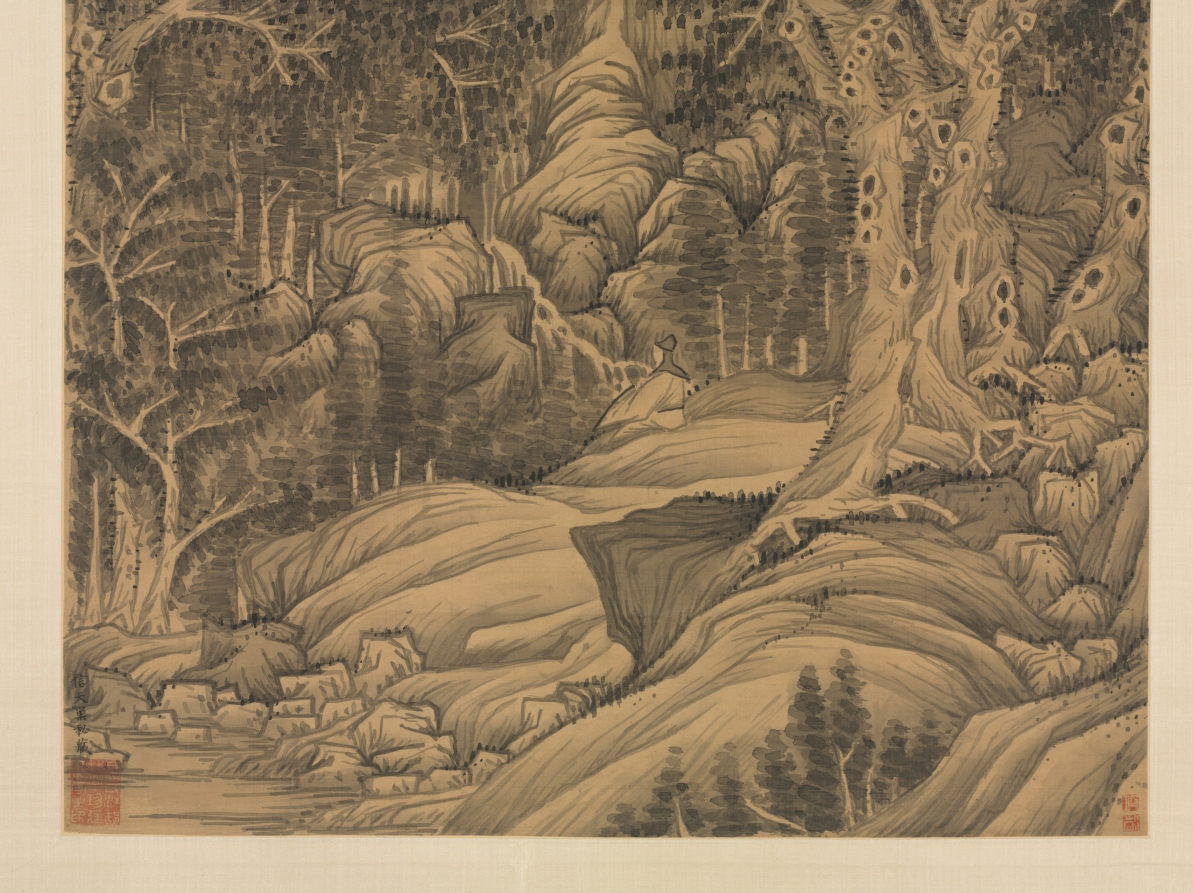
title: The Mountain of Five Cataracts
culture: China, Ming dynasty (1368–1644)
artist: Chen Hongshou (Chinese, 1598/99–1652)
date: c. 1630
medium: hanging scroll; ink on silk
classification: Painting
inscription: Artist's signature and seal at middle right edge: Hongshou [seal] Zhanghou 洪绶 [印]章侯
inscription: Inscription by Gao Shiqi 高士奇 (1645–1704): The Mountain of the Five Cataracts is bordered by three prefectures--Wu [Jinhua], Hang [Hangzhou], and Yue [Shaoxing]--and is quite close to Jiyang [Zhuji] in Yue. The landscape there is extraordinary and precipitous, with ridges and peaks standing in circles. Rocks of strange shapes gaze down everywhere, while maple and bamboo provide shade. The water from five pools overflows and is suspended in five steps--that is why it is called "Five Cataracts." Xie Yuanqing [Xie Tiao 謝朓, c. 464–499] of the Qi Dynasty gathered medicinal herbs here; Diao Jingchun [Diao yue 刁約, 11th century] of the Song Dynasty also visited here; Song Jinhua [Song Lian 宋濂, 1310–1381] and Xu Tianchi [Xu Wei 徐渭, 1521–1593] both wrote travel notes about the place; and Chen Hongshou painted here. His mountains are done in the style of the Six Dynasties masters; the trees are after those of Dong Beiyuan [董源 Dong Yuan, active during the Five Dynasties]--the painting seems to be richly imbued with the primeval spirit. Xu Wei said that the grotto is unique for the shade (yin) and the five cataracts unusual for the sun (yang). There are seventy-two peaks, with a ravine between two cliffs. At times they are bright and at other times, gloomy; sometimes they seem to be open, sometimes closed, yet often border uniquely between shady (yin) and sunny (yang). Zhanghou [Chen Hongshou] really succeeded in capturing that spirit. As a young man indulgently boating through Shanyin [Shaoxing],/ I became familiar with the beauty of the Five Cataracts./ The cold streams, when level, become pools clear as crystal./ Pouring foam mingled with flying waterfall,/ Its shapes constantly changing./ Water would flow downward without a sound,/ Or become raging billows emitting echoes./ Sometimes the wind from the sky would wail,/ The green forest during the day would turn dark./ Sometimes it was dangerous and difficult to ascend,/ For the moss was slippery on the stone steps in those precipitous cliffs./ After reading the travel notes of Sung [Lian] and Xu [Wei],/ I'm afraid their descriptions are incomplete. / Yet when Laolian [Chen Hongshou] was seized with the inspiration to paint,/ His brush and ink moved with exhilaration./ It is as if mists have risen/ From a hot cooking pot, gradually opened./ By hanging this on a plain wall,/ One can clearly listen to the quiet night./ At the end of the year, ice and snow are deep;/ The cold air in the quiet studio is frozen./ Near the fireplace, I make with it a silent, spiritual acquaintance/ Burning incense and striking a lucid qing [stone chime]. On the eighteenth day of the twelfth month in the jimao year of the Kangxi era [1699]. Jiangcun, Gao Shiqi. Zhuchuang inscribed this at Zhe in the Lan Jing studio. It was the third day after the beginning of spring. trans. LYSL/HK/WKH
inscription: Collector's inscription by Gao Shiqi 高士奇 (1645–1704), one column in standard script at the lower left corner: 信天巢秘藏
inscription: 5 seals of Gao Shiqi 高士奇 (1645–1704): 竹窗 Zhu Chuang; 高士奇 Gao Shiqi; 澹人 Danren; 簡靜齋 Jian Jing Zhai (Gao Shiqi's studio; at the upper left corner); 高氏江村草堂珍藏書畫之印 Gaoshi Jiangcun Caotang Zhencang shuhua zhi yin (at the lower left corner).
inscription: Two additional seals at the lower left and right corners are undecipherable.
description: A unique landscape painting in the existing body of Chen Hongshou’s art, this painting reveals his involvement with the practice of fang (imitation) to achieve creative transformation. Chen acquired the tradition stemming from Dong Yuan of the Five Dynasties, with which he sought an artistic individuality that lends his work an idiosyncratic vision and extraordinary power.